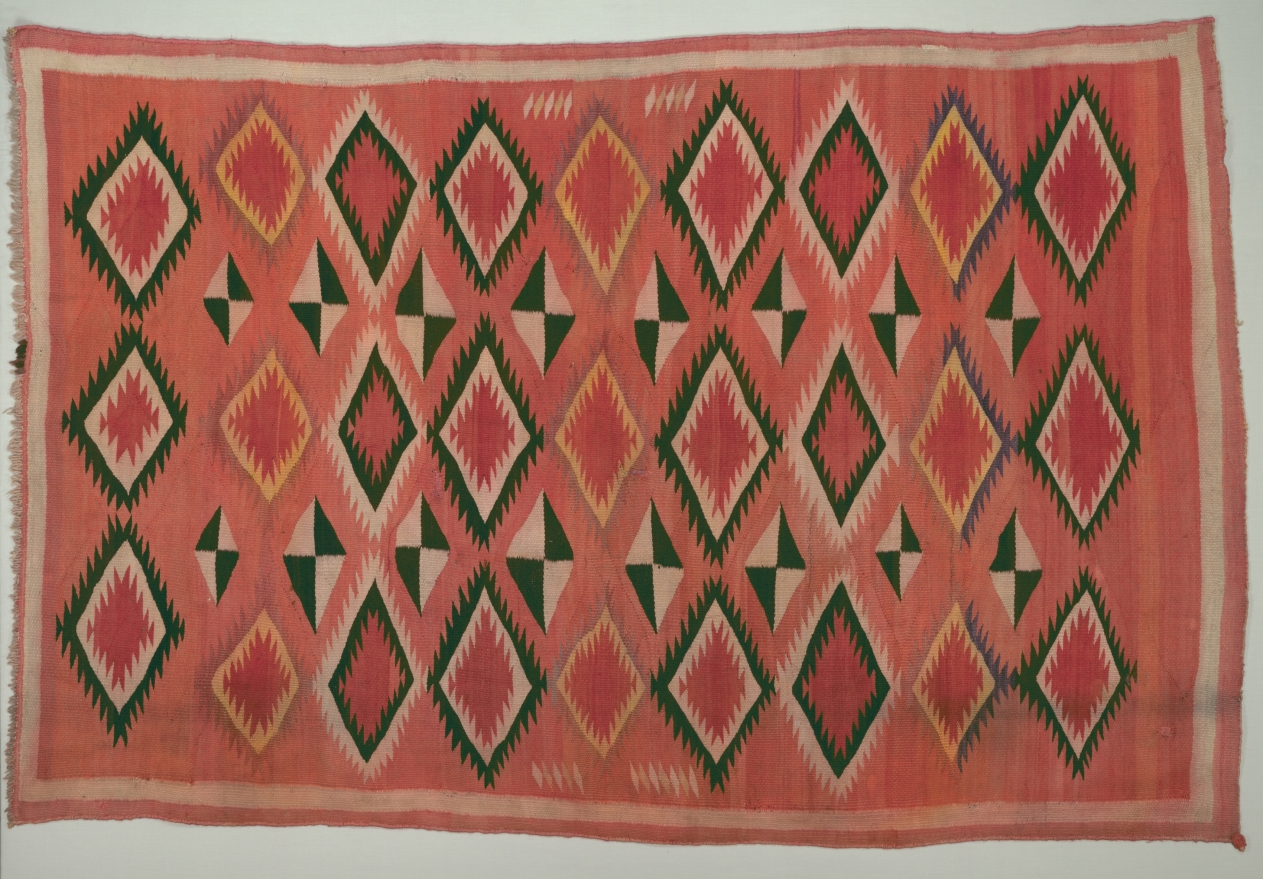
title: Rug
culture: America, Native North American, Southwest, Navajo, Post-Contact, Transitional Period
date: c. 1890–1900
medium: tapestry weave: wool (handspun)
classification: Textile